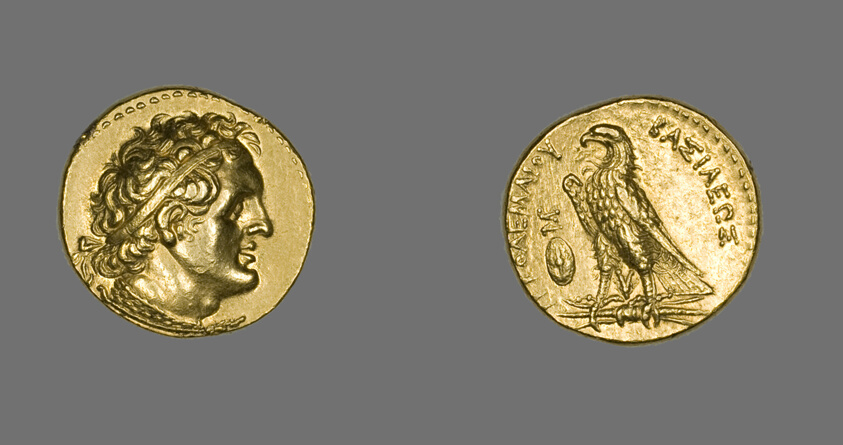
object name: Coin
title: Pentadrachm (Coin) Portraying King Ptolemy I Soter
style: ptolemaic, greco-roman (egyptian), ancient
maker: Greek, Ptolemaic; minted in Cyprus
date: 285-247 BCE, issued by King Ptolemy II Philadelphos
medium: Gold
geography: Cyprus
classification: coin; ancient art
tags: animals